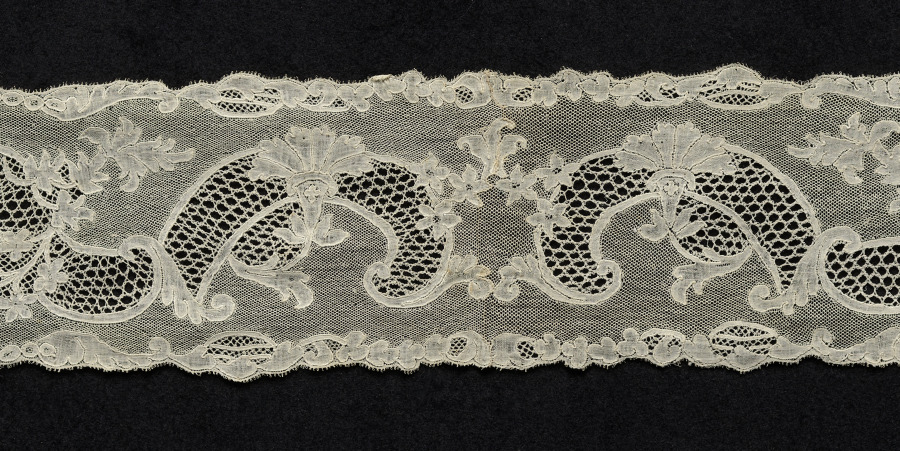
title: Lace Lappet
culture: Belgium, Mechelen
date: 1715–74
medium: Linen: bobbin lace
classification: Lace